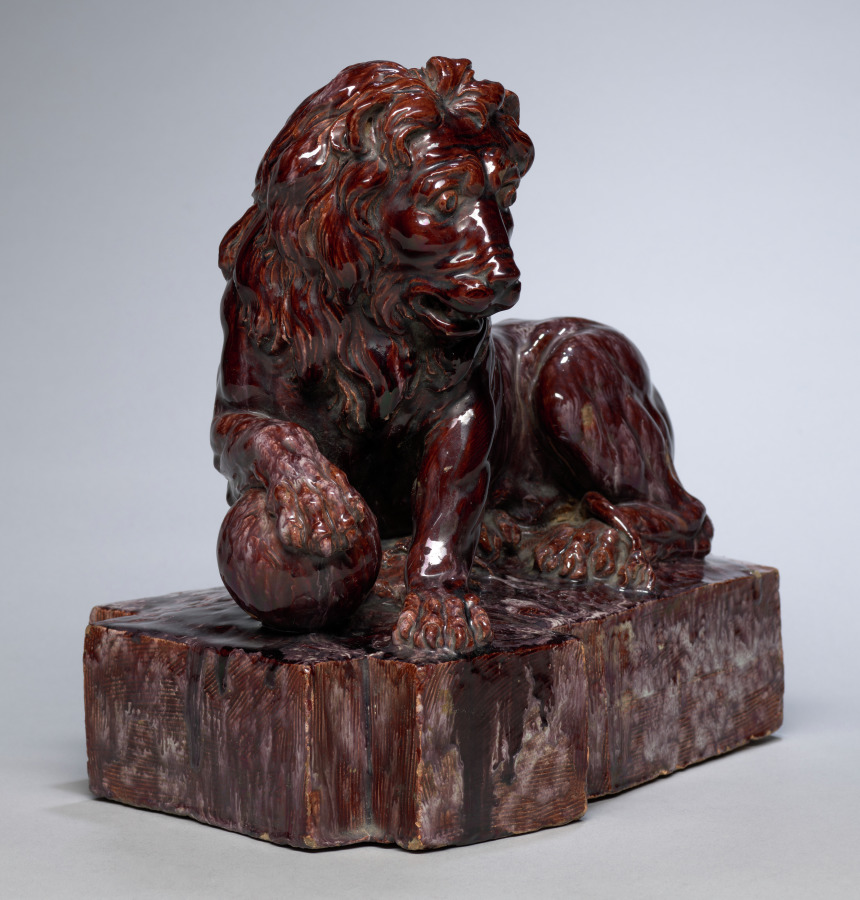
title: Lion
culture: France, 20th century (?)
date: 1900s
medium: terracotta glazed in mottled purple tin glaze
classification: Ceramic